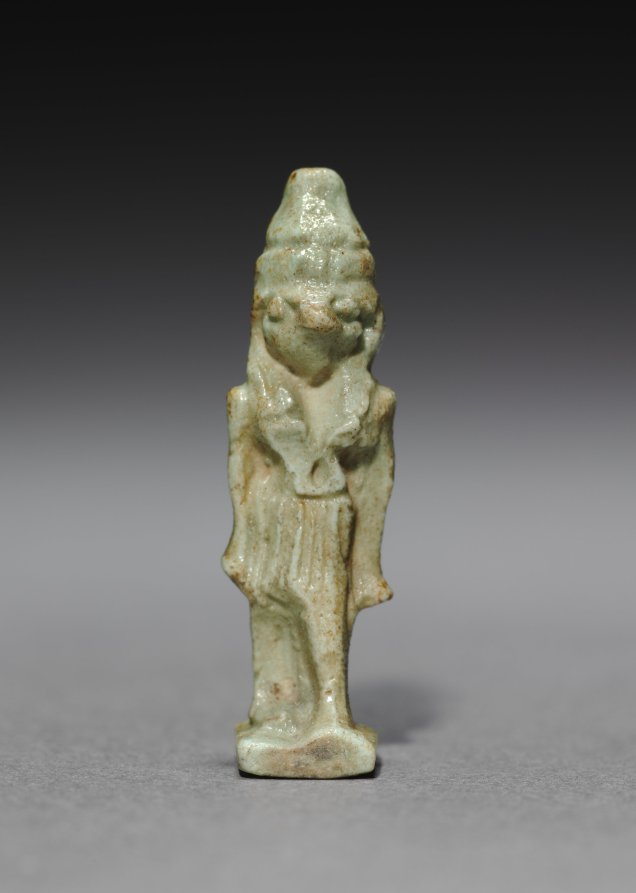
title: Amulet of Horus (?)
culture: Egypt, Late period (715–332 BCE), Dynasty 30–Greco-Roman period (332 BCE–395 CE), Ptolemaic dynasty (305–30 BCE)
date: 380–30 BCE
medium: gray green faience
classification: Amulets